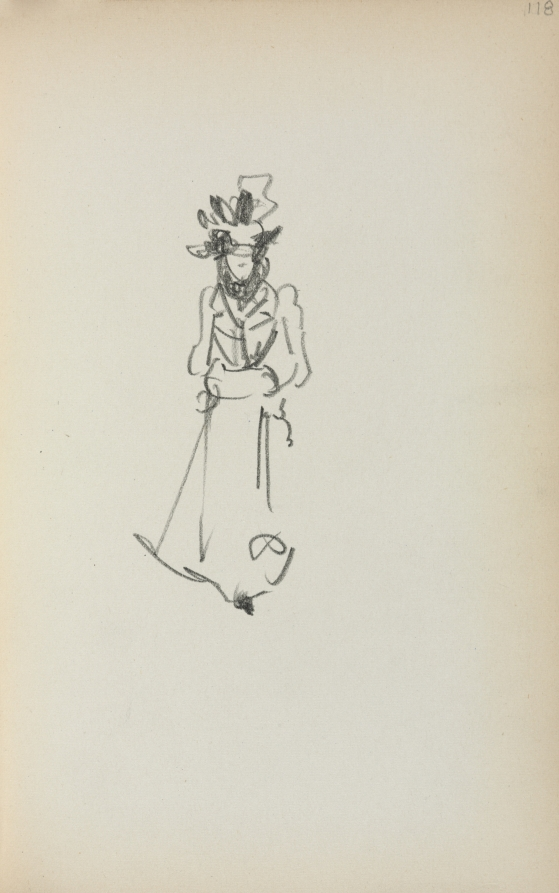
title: Italian Sketchbook: Standing Woman ( page 118)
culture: America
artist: Maurice Prendergast (American, born Newfoundland [now Canada], 1858–1924)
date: 1898–1899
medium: pencil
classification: Bound Volume